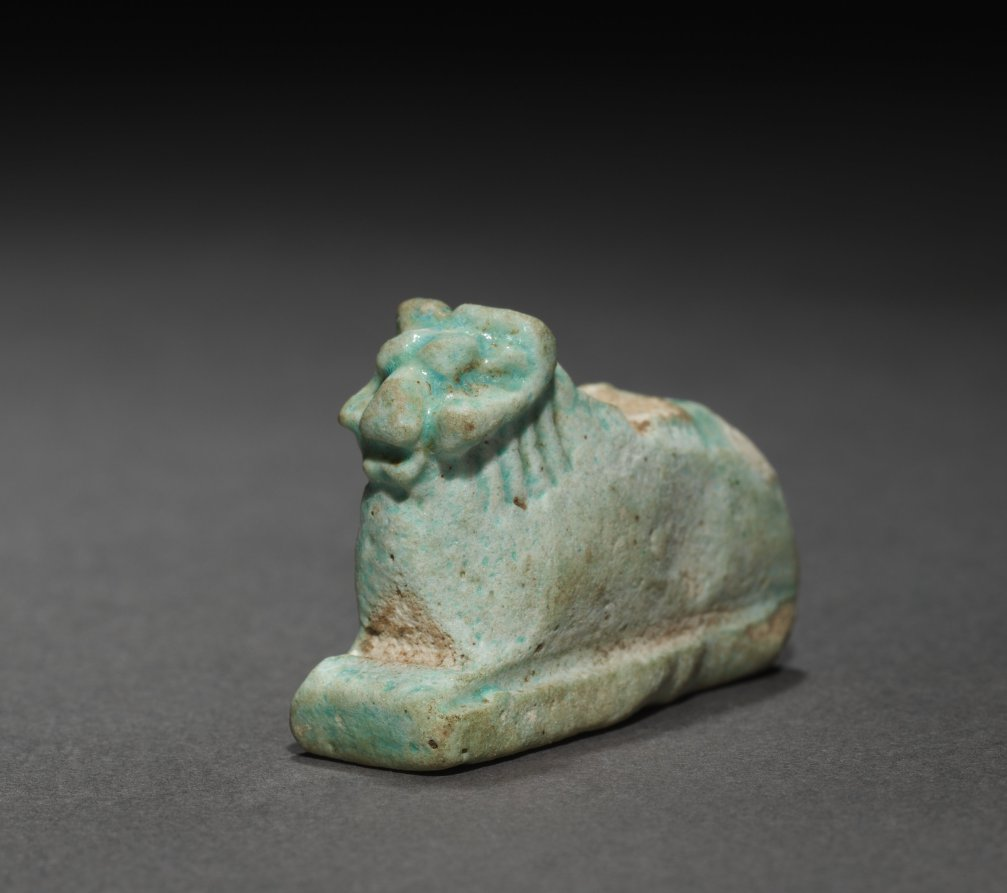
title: Ram Amulet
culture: Egypt, Greco-Roman period (332 BCE–395 CE), Ptolemaic dynasty (305–30 BCE)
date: 305–30 BCE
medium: light robin's egg blue faience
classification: Amulets